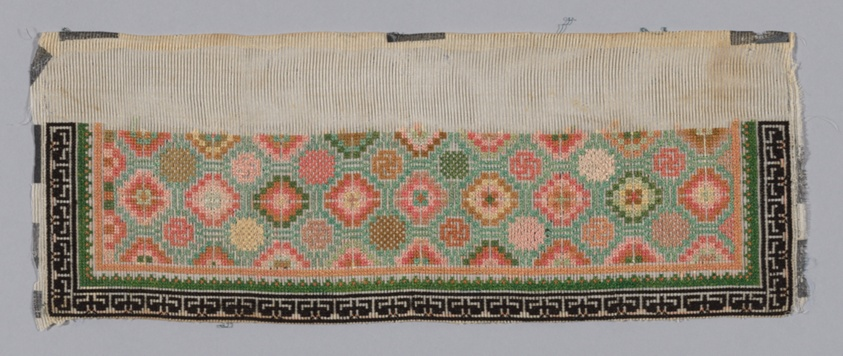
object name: Costume and Accessories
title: Trouser Band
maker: Han-Chinese (China)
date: Qing dynasty (1644–1911), 1875/1900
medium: Forty-four pairs and eight odd pieces of embroidered sleeve, ankle bands, etc. on gauze.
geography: China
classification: costume - embroidery; embroidery; costume